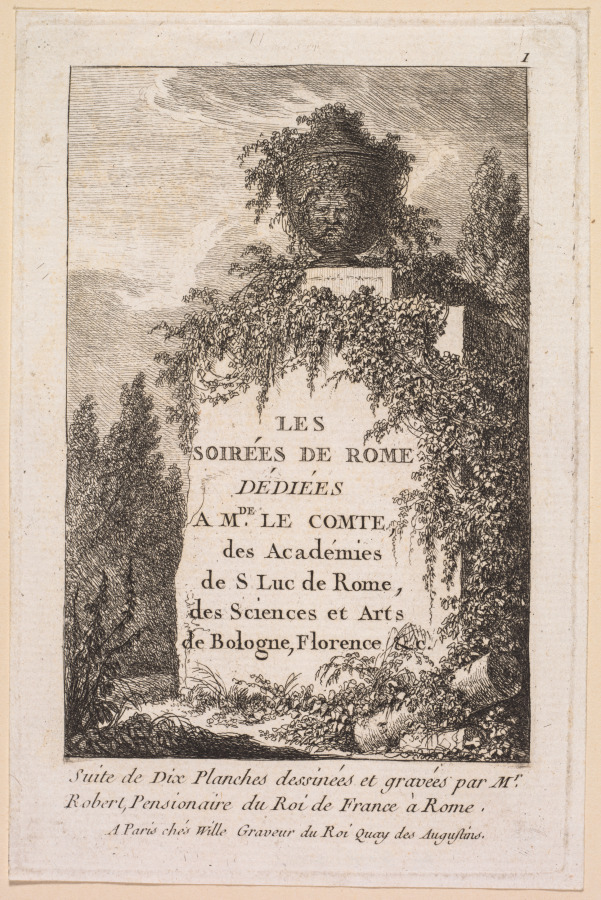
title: Title Page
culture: France, 18th century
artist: Hubert Robert (French, 1733–1808)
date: 1763–64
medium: etching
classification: Print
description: Derived from his own pen-and-ink drawings, this suite of etchings features fictional characters situated near recognizable buildings and statues in Rome. On the title page, Robert dedicated the suite to Marguerite Le Compte, who visited Rome in 1764 in the company of the wealthy author and art enthusiast Claude Henri Watelet. Both Le Compte and Watelet were amateur etchers, and they socialized with a group that included artists and printmakers centered at the academies in Italy. Robert’s dedication was likely motivated by the hope of future patronage from Le Compte. She may be the generous woman with a hand muff depicted in The Ancient Temple, the fifth scene in this series.